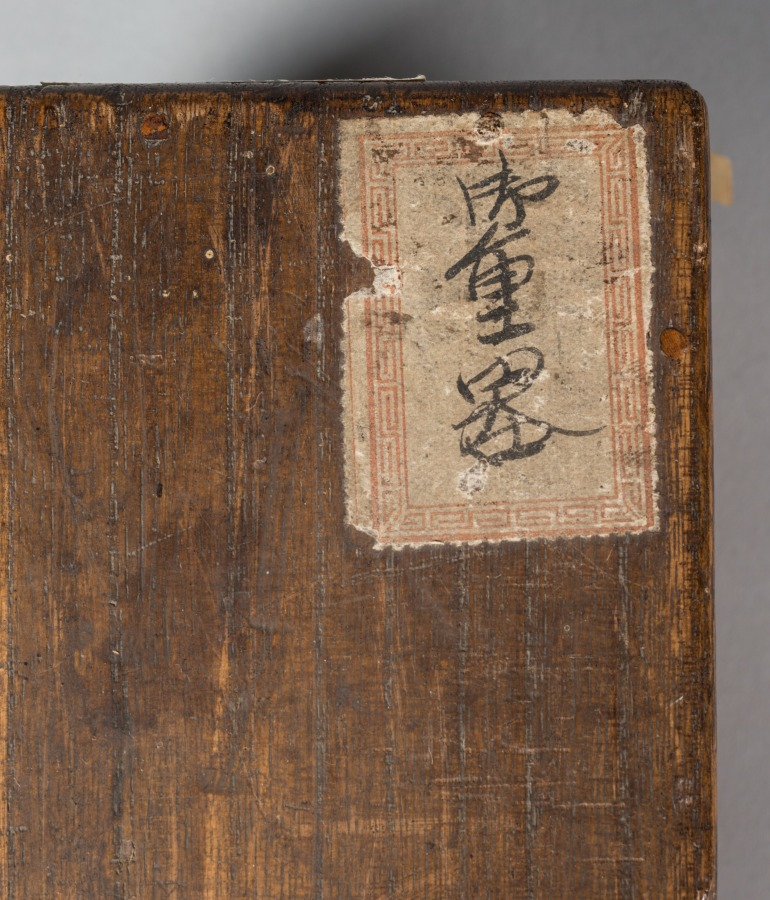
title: Emperor Minghuang Teaching Yang Gueifei to Play the Flute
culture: Japan, Muromachi period (1392–1573)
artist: Choryusai (Japanese)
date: late 1400s–early 1500s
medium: hanging scroll; ink and color on paper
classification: Painting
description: Minghuang, a prominent emperor of Tang (618-906) China and his consort, Yang Gueifei, have inspired many legends, paintings, and poetry in later Chinese culture. Through the study of Chinese literature and the collecting of Chinese paintings, tales of their lives and romance became well-known in Muromachi Japan.